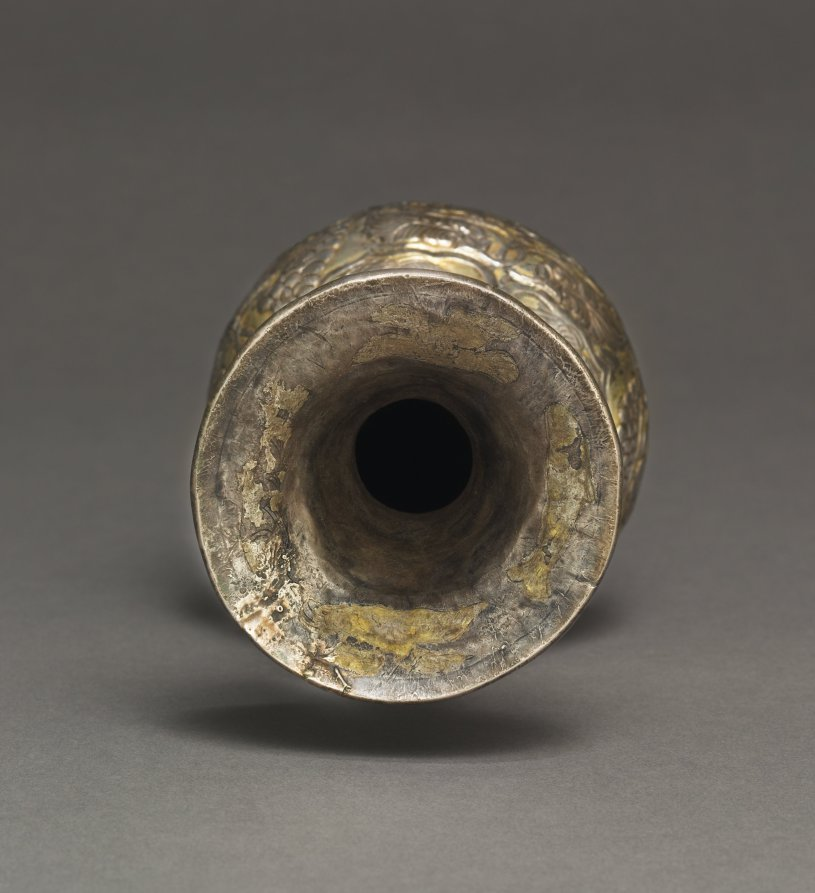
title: Vase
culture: Central Asia (Sogdiana) or Tibet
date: c. late 600s–early 700s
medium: silver with gilded foil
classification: Silver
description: Located amid the vast “silk roads” trade network, medieval Tibet was a place of dynamic cultural exchange. This decanter is evidence of such interactions. The vessel is part of the tableware used to hold wine during feasts. Tibetan elites adopted the tradition of consuming wine at social gatherings from their Iranian (Persian) contemporaries, whose wine banquets were lavish affairs with plentiful food and drink.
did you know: Lions were often seen as powerful protectors while phoenixes were associated with good fortune.